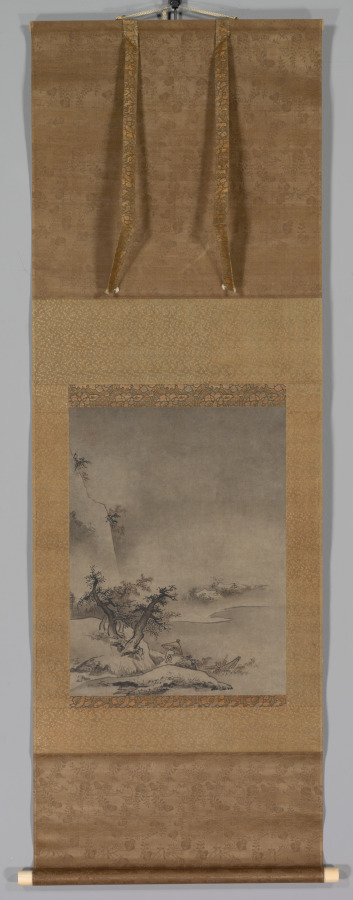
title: Chinese Servant Walking in the Rain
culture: Japan, Muromachi period (1392–1573)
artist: attributed to Gakuō Zōkyū (Japanese, active about 1482–1514)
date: 1500s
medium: hanging scroll; ink on paper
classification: Painting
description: Attributed to the artist Gakuō, this painting has a spurious seal of the influential Shōkokuji temple monk-painter Tenshō Shūbun (died about 1444–50), with whom he is said to have trained. Gakuō may have hailed from Ise in present-day Wakayama prefecture, an area south of Kyoto in the Kansai region. Although not much is known about his life, inscriptions on some of his paintings indicate strong ties with eminent monks in Kyoto’s major Zen temples.